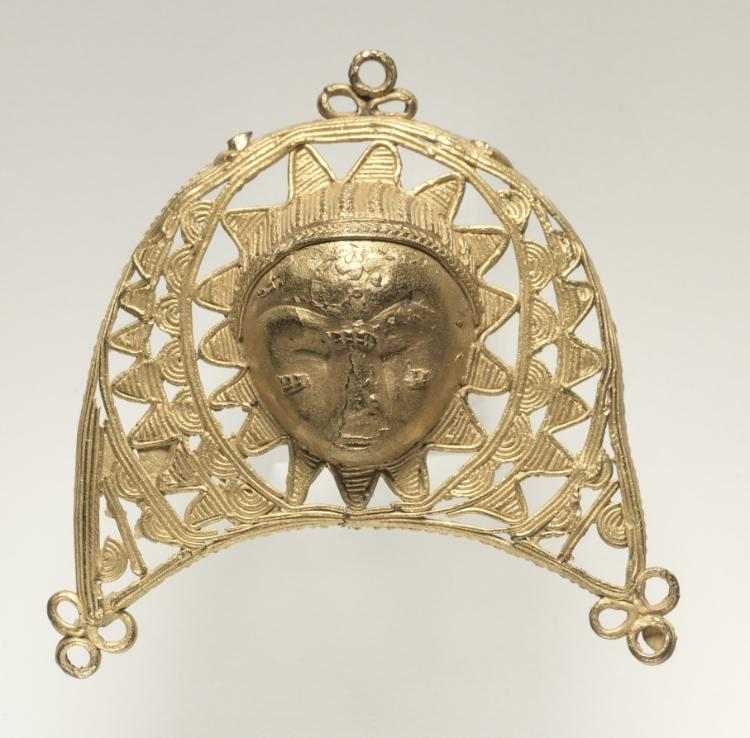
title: Pendant: Face in Crescent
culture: Africa, West Africa, Côte d'Ivoire, probably Baule-style goldsmith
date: 1900s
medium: Gold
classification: Jewelry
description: This pendant was cast in gold using the lost-wax method. Gold objects are the only Baule art forms associated with ancestor spirits. Usually hidden in pots or suitcases, gold adornments are displayed on important occasions such as funerals. They are laid out around the corpse before burial. A widow will wear them on a chain around her neck or attached to her hair at the ceremony signaling the end of mourning.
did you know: Although the surface of this pendant was likely enriched (worked to enhance the surface level of gold) at the time of manufacture, the dark spots on the face show us where this enriched layer has worn away.